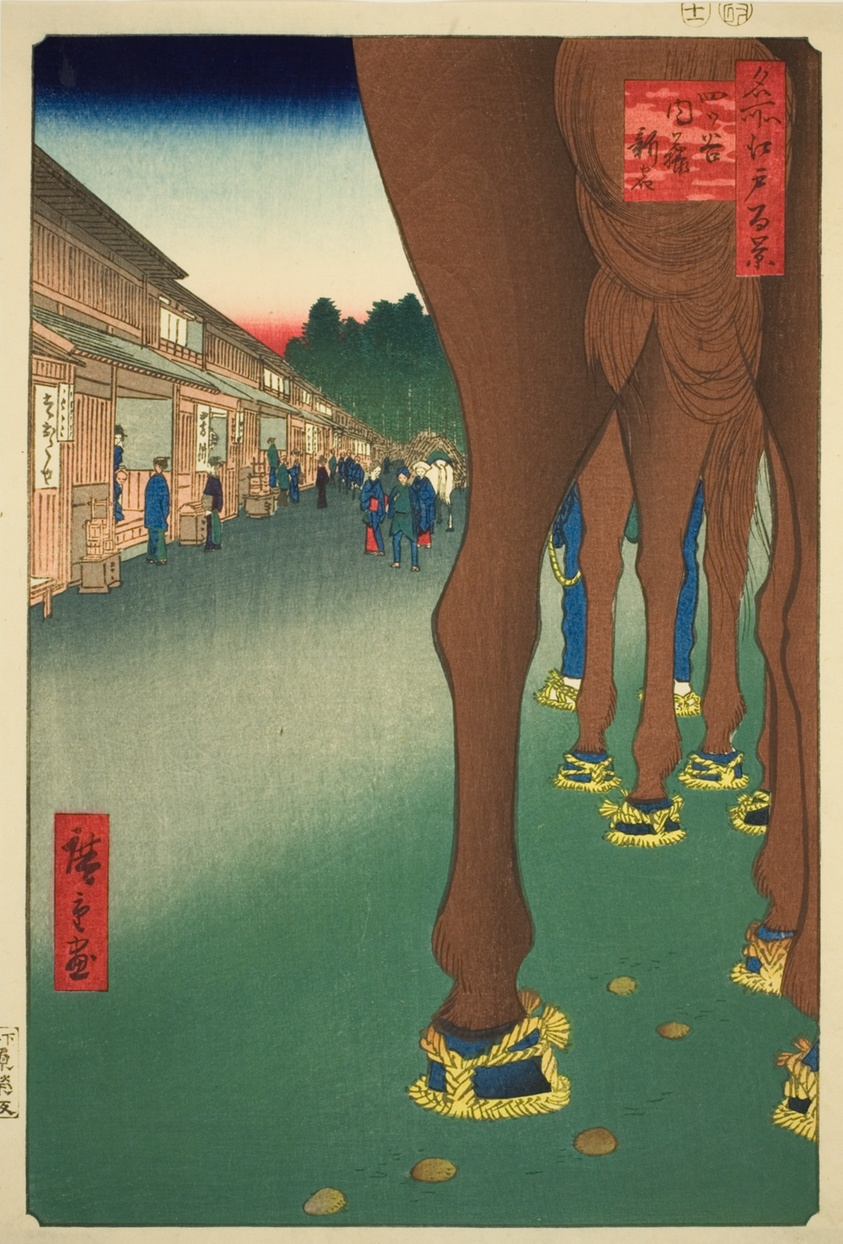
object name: Print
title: Naito Shinjuku at Yotsuya (Yotsuya Naito Shinjuku), from the series “One Hundred Famous Views of Edo (Meisho Edo hyakkei)”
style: Japanese (culture or style)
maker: Utagawa Hiroshige 歌川 広重; Japanese, 1797-1858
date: 1857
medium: Color woodblock print; oban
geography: Japan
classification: woodblock print; print; asian art